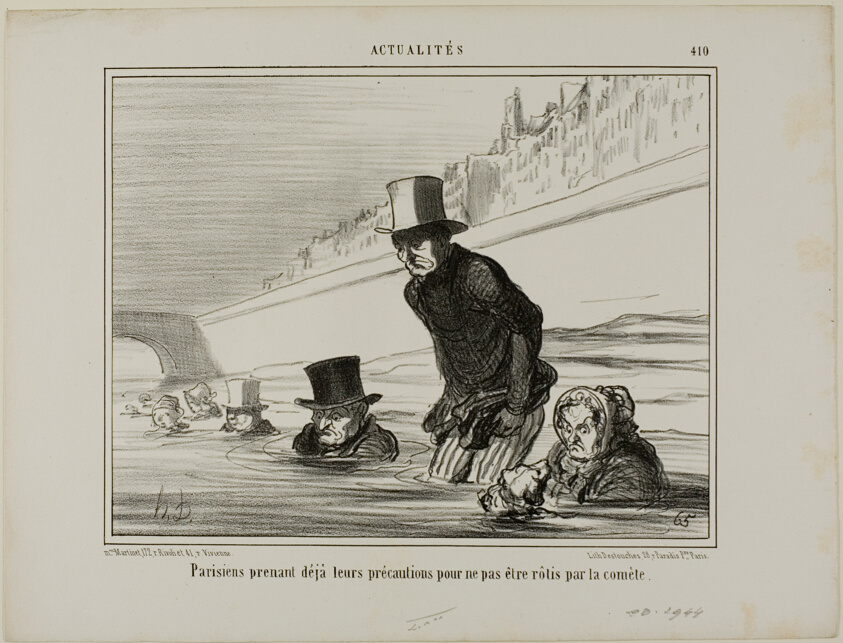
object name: Print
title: Parisians already taking their precautions to avoid being roasted by the comet, plate 410 from Actualités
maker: Honoré Victorin Daumier; French, 1808-1879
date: 1857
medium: Lithograph in black on white wove paper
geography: France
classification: lithograph; print; prints and drawing